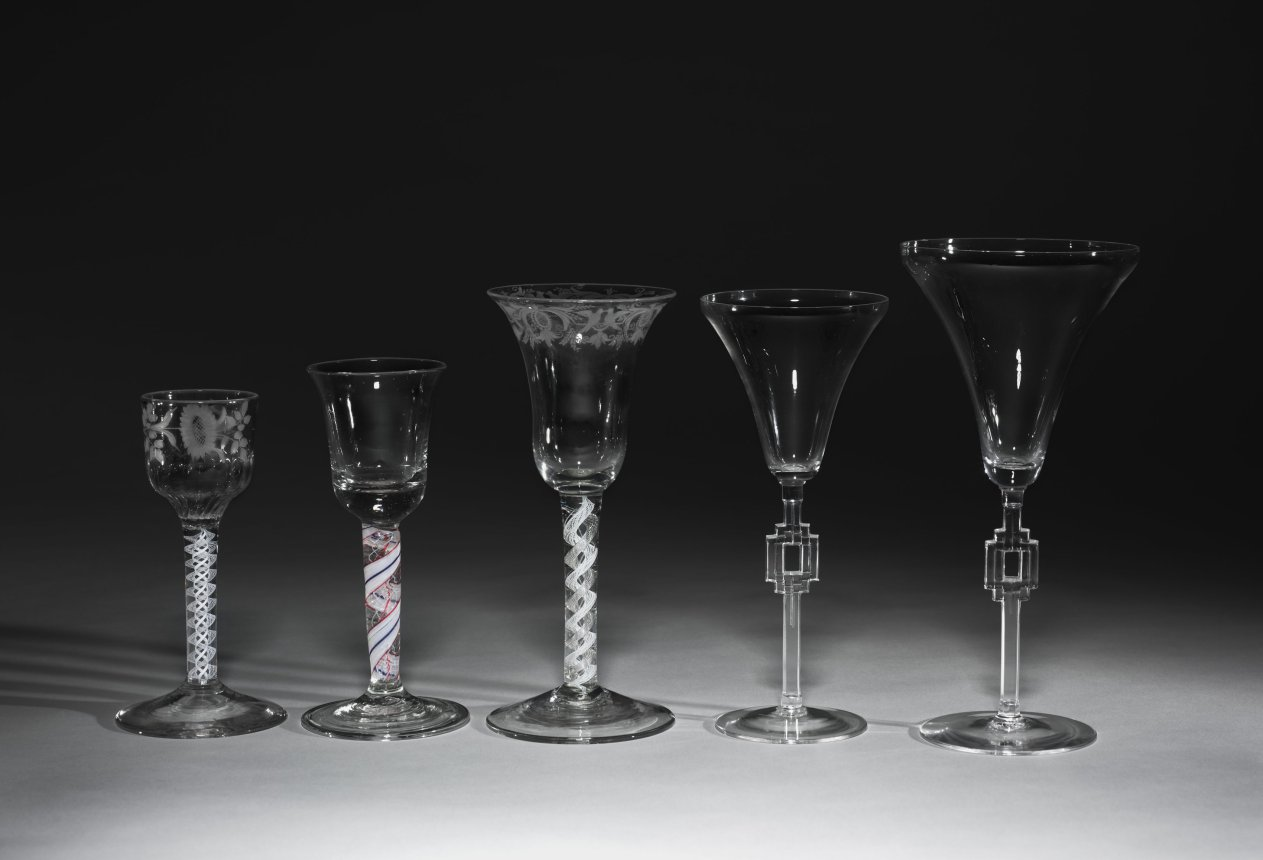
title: Wine Glass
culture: France, 20th century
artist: René Lalique (French, 1860–1945)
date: 1925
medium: glass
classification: Glass